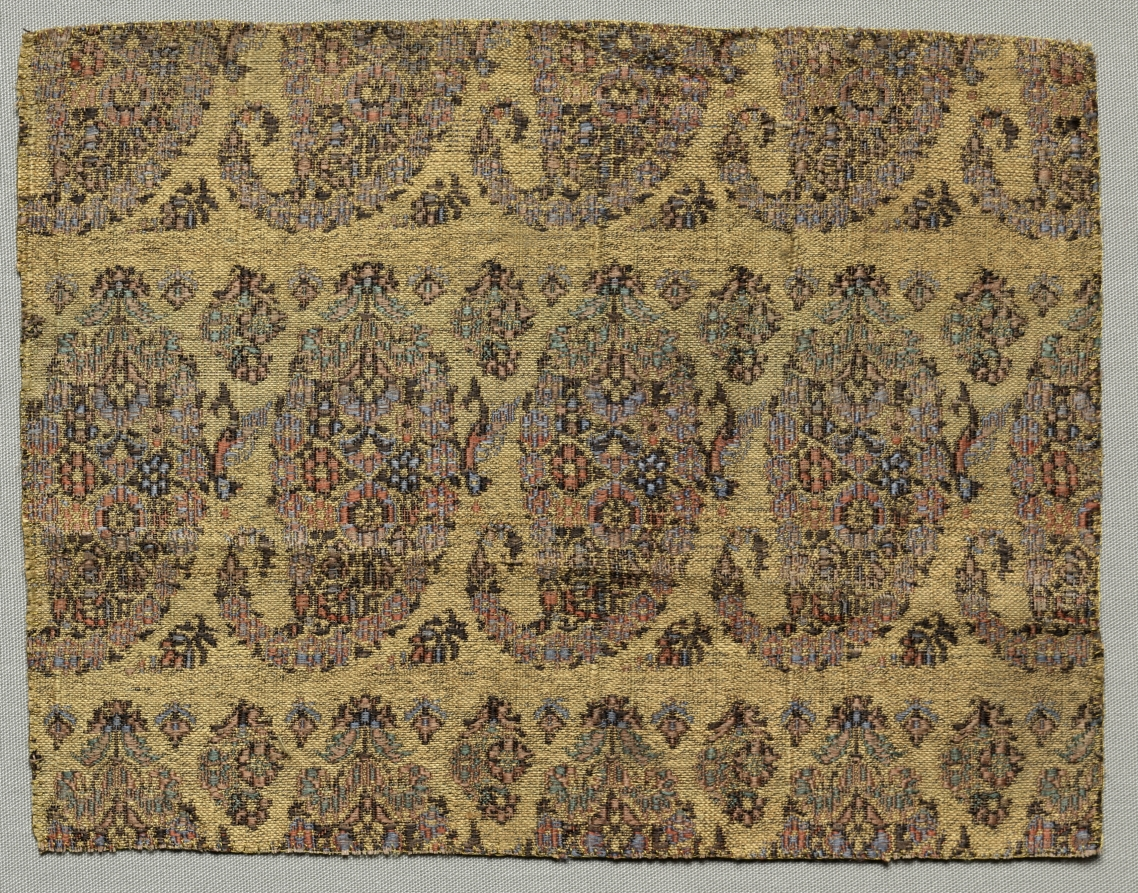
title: Fragment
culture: Iran, 18th century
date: 1700s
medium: lampas weave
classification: Textile